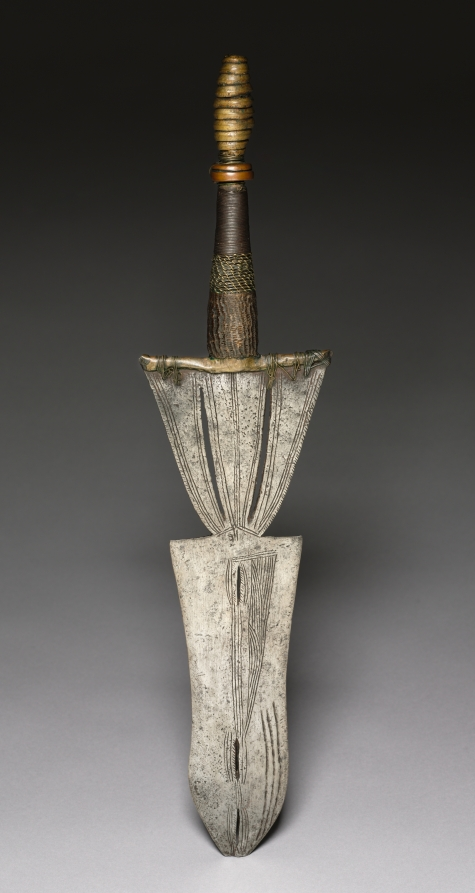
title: Knife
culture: Africa, Central Africa, Democratic Republic of Congo, Bangala-style maker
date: before 1916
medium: Iron, copper alloy, wood, and cloth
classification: Arms and Armor